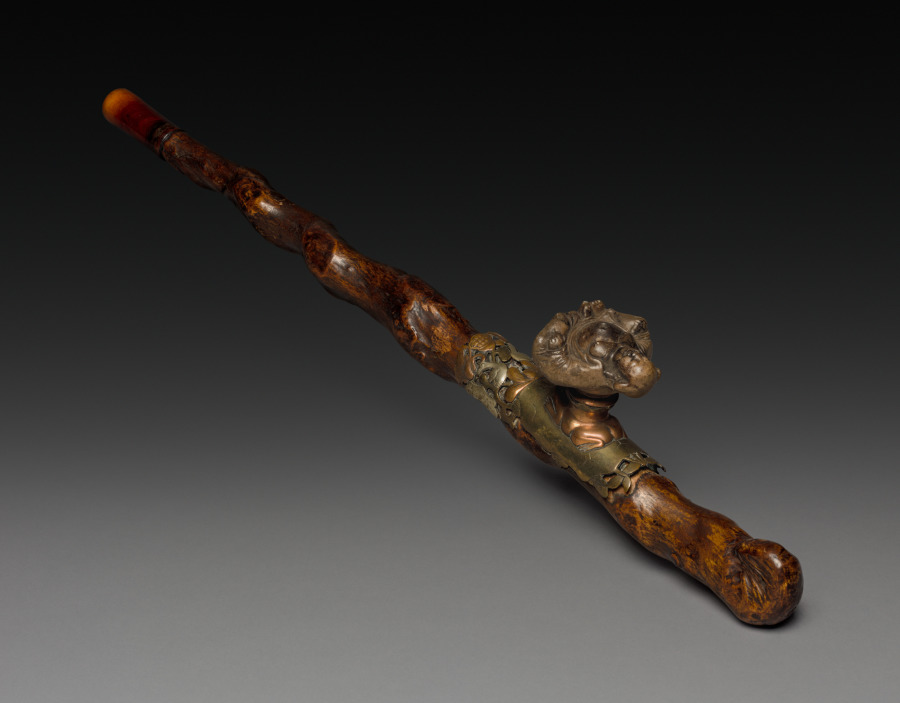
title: Opium Pipe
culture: China, Qing dynasty (1644-1911)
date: 1800s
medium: wood and ivory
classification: Miscellaneous